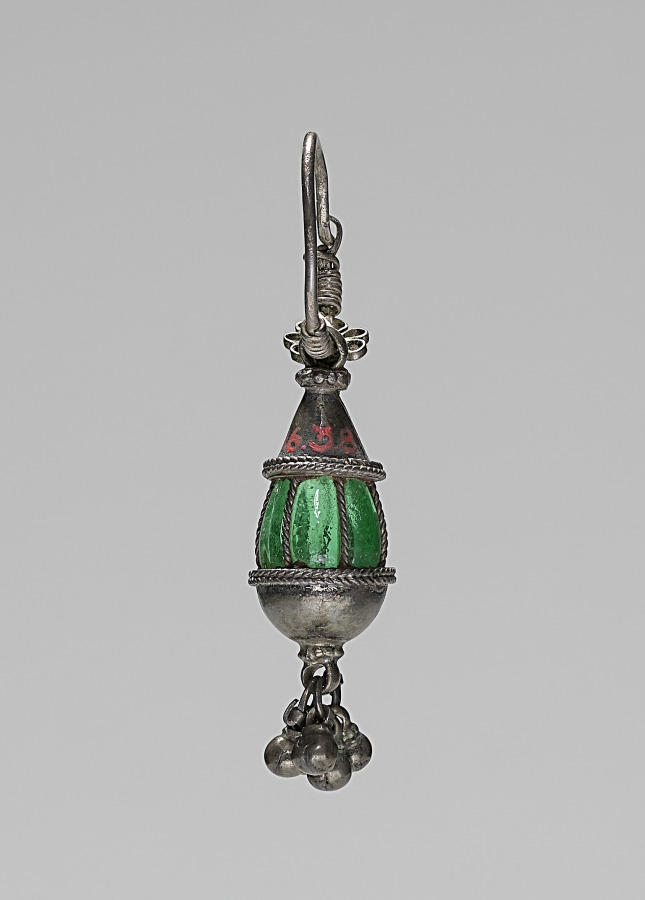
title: Earring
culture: India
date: 1800s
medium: silver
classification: Jewelry